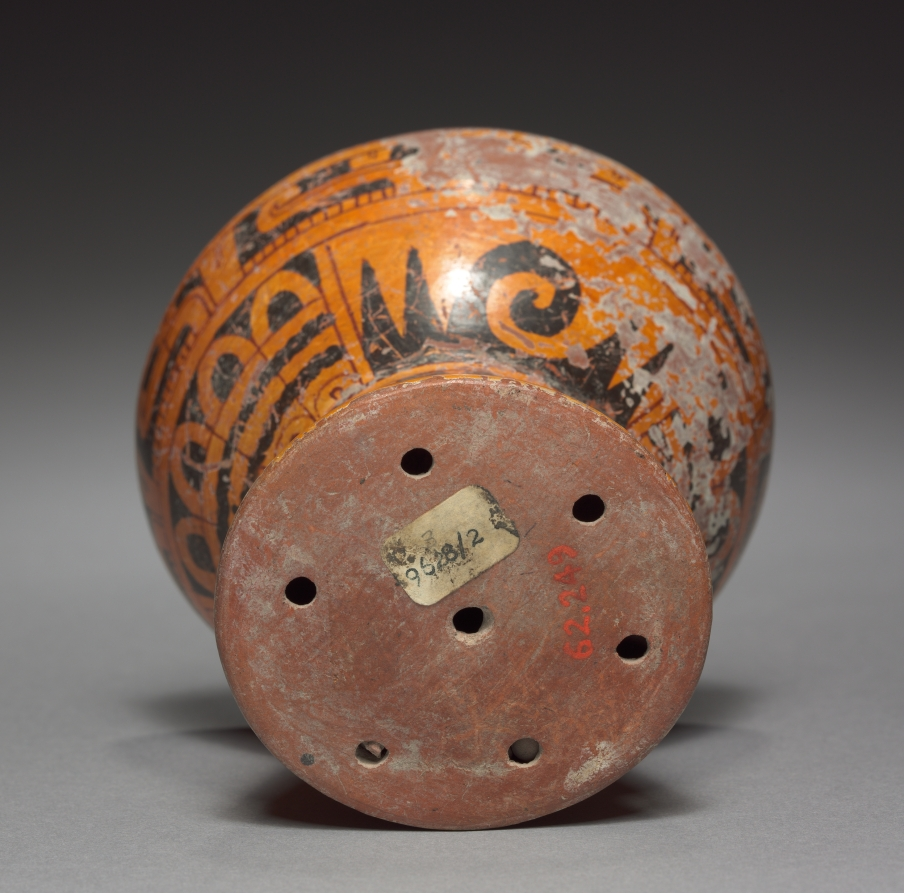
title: Bowl with Rattle Base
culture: Mexico, Cholula?, Mixteca-Puebla Style, 10th-16th century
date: c. 900–1519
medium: earthenware with colored slips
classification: Ceramic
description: The nobility may have used these goblets for a chocolate beverage or for pulque, made from the fermented sap of the maguey cactus. Both are painted with the precision and brilliant colors for which the Mixteca-Puebla style is renowned, and they carry some of the same motifs, such as the band of stylized animal heads at the top. The smaller bowl has a rattle base.